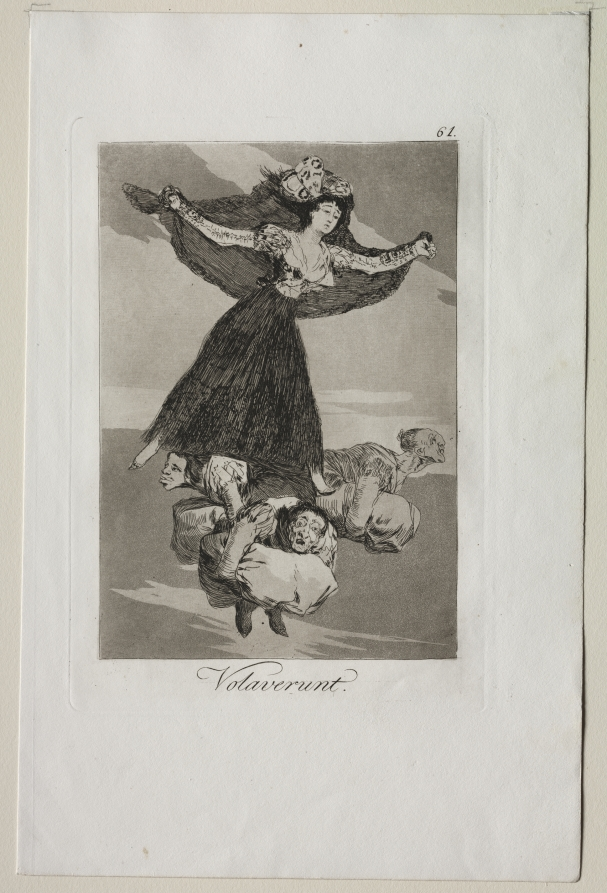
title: They Have Flown, Plate 61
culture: Spain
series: Los Caprichos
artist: Francisco de Goya (Spanish, 1746–1828)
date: 1799, printed c. 1855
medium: etching and aquatint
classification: Print